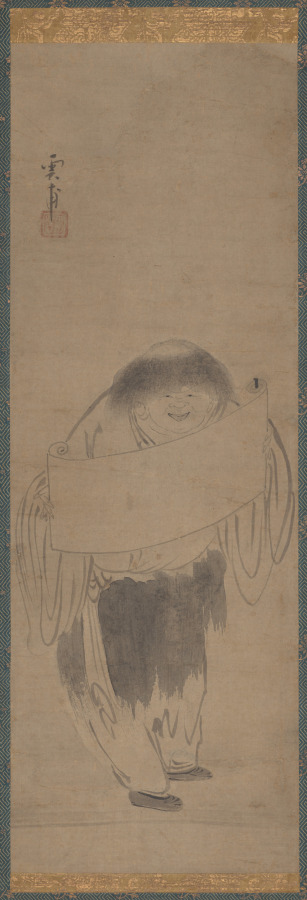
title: Kanzan Holding a Scroll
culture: Japan, Muromachi period (1392–1573)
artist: Unpo Shūkū (Japanese, active 1400s)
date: 1400s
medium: hanging scroll; ink on paper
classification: Painting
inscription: signed: "Unpo"